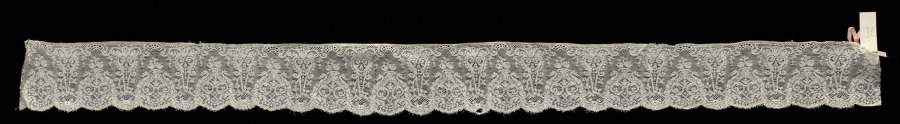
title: Lace Edging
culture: England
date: 1800–1840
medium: Machine-made lace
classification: Lace